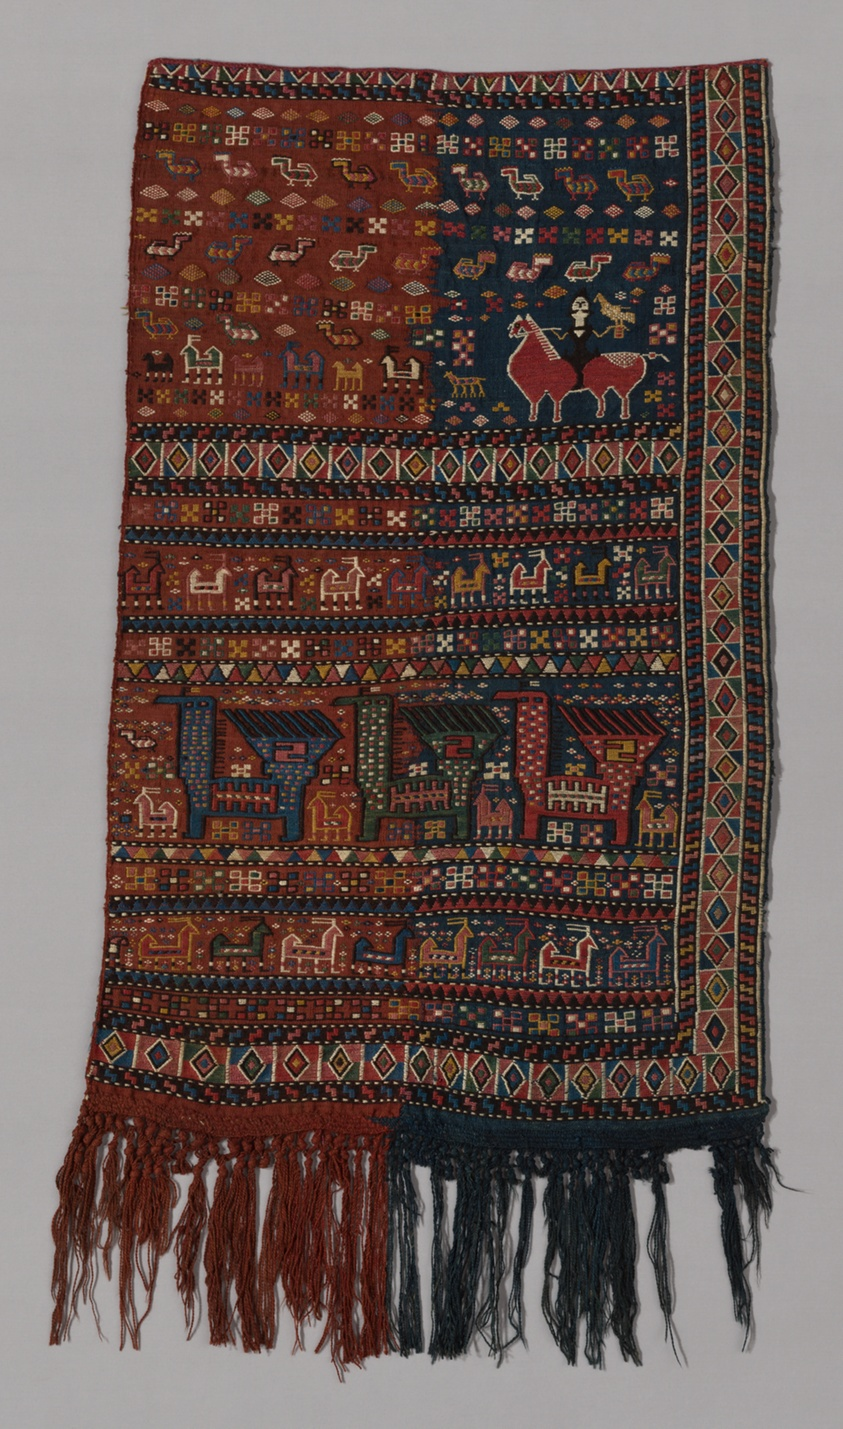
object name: Textile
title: Saddle Cover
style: Folk Art, caucasian, central asian, asian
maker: Caucasus, Karabagh District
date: 19th century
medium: Wool; plain weave with supplementary weft wrapping (sumakh); plaited and knotted warp fringe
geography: Caucasus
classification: textile; weaving